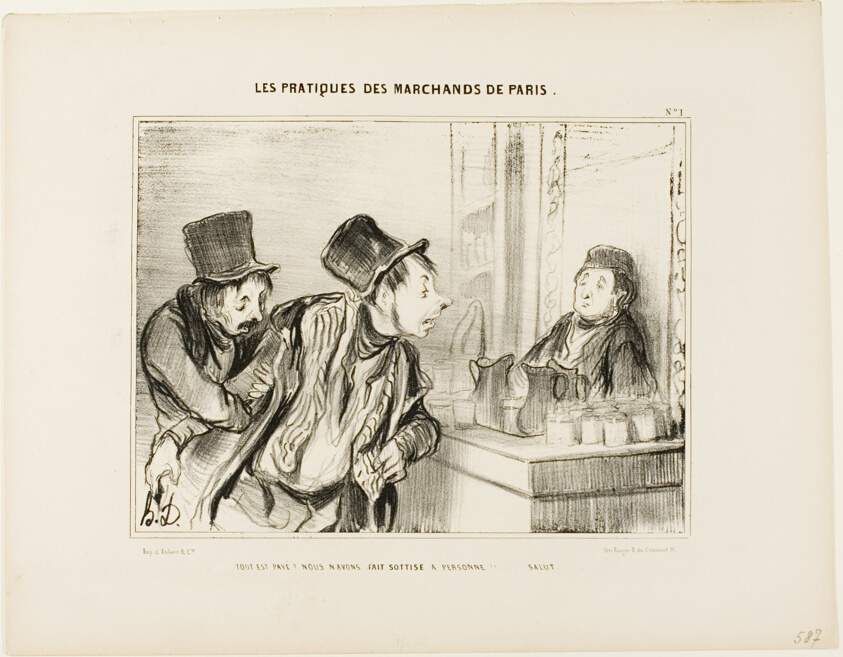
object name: Print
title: “Everything is Paid for? And We Didn't Insult Anyone… Bye,” plate 31 from Types Parisiens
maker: Honoré Victorin Daumier; French, 1808-1879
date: 1839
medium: Lithograph in black on white wove paper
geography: France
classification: lithograph; print; prints and drawing